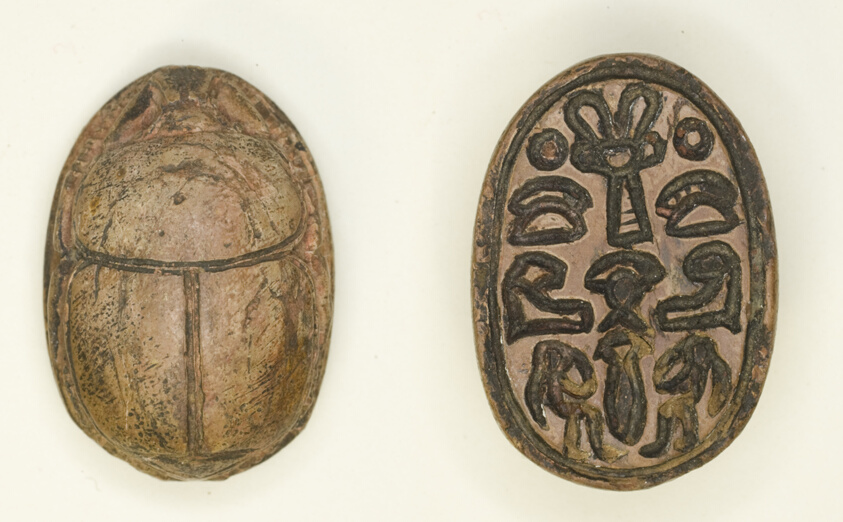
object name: Costume and Accessories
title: Scarab: Hathor Sistrum with Hieroglyphs (xaw-signs, hAt-signs, child signs, papyrus stalk)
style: middle kingdom, twelfth dynasty, ancient, egyptian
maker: Egyptian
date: Middle Kingdom, Dynasty 12 (about 1950–1773 BCE)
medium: Steatite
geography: Egypt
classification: scarab; ancient art; costume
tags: scarab beetle, musical instruments, insects, Hieroglyphs, children